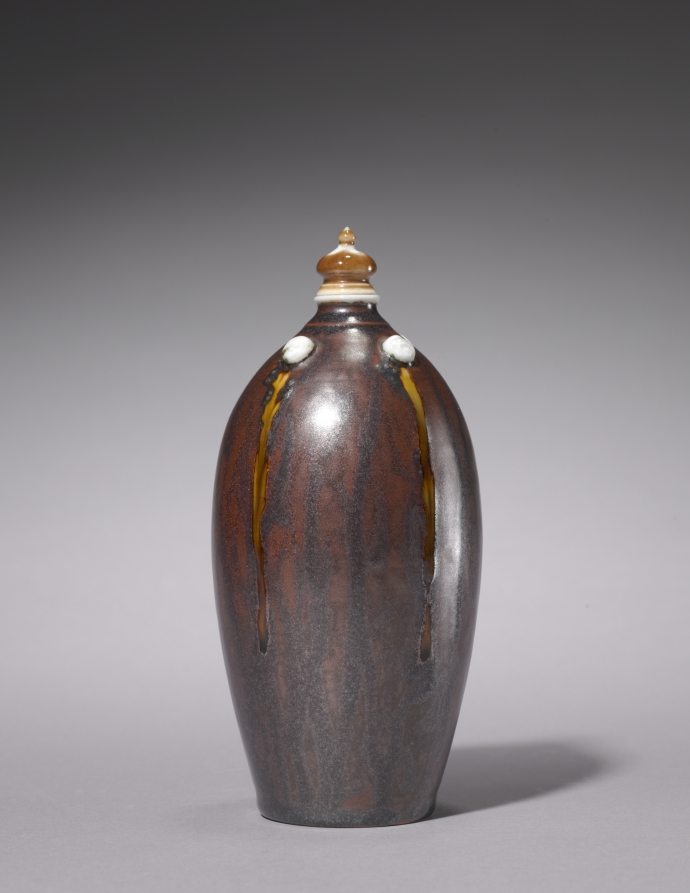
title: Covered Vase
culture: France, 20th century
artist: Sèvres Porcelain Factory (French, est. 1756)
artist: Taxile Maximin Doat (French, 1851–1939)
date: 1901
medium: porcelain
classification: Ceramic